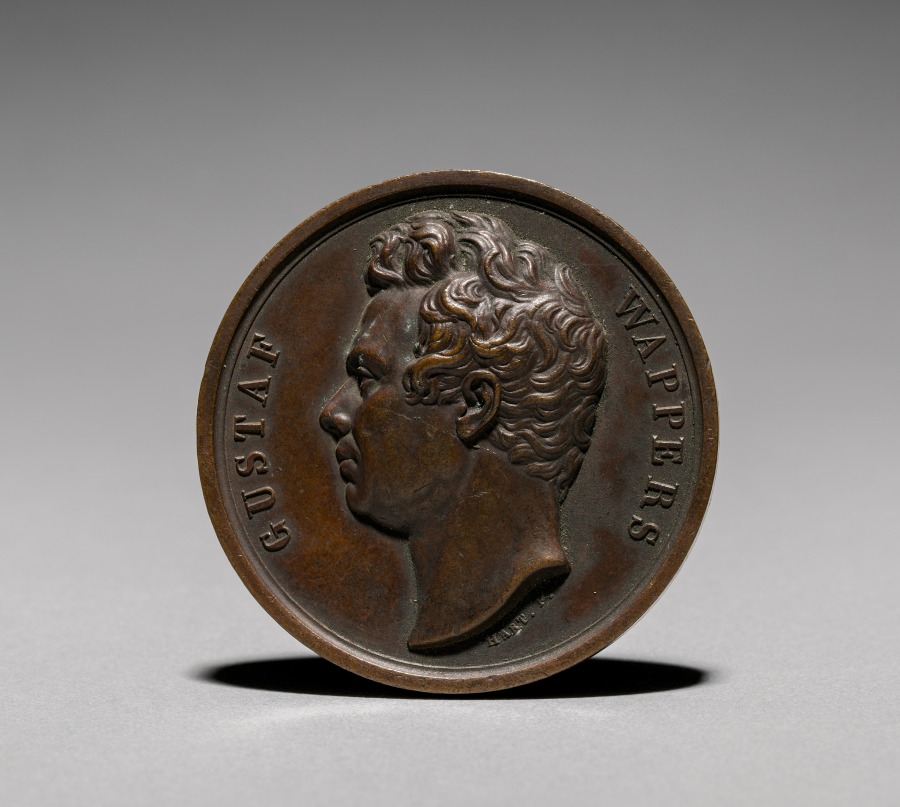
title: Medal: Gustaf Wappers (obverse)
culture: 19th century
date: 1800s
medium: bronze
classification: Metalwork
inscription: "GUSTAF WAPPERS"; signed: "Hart. F."